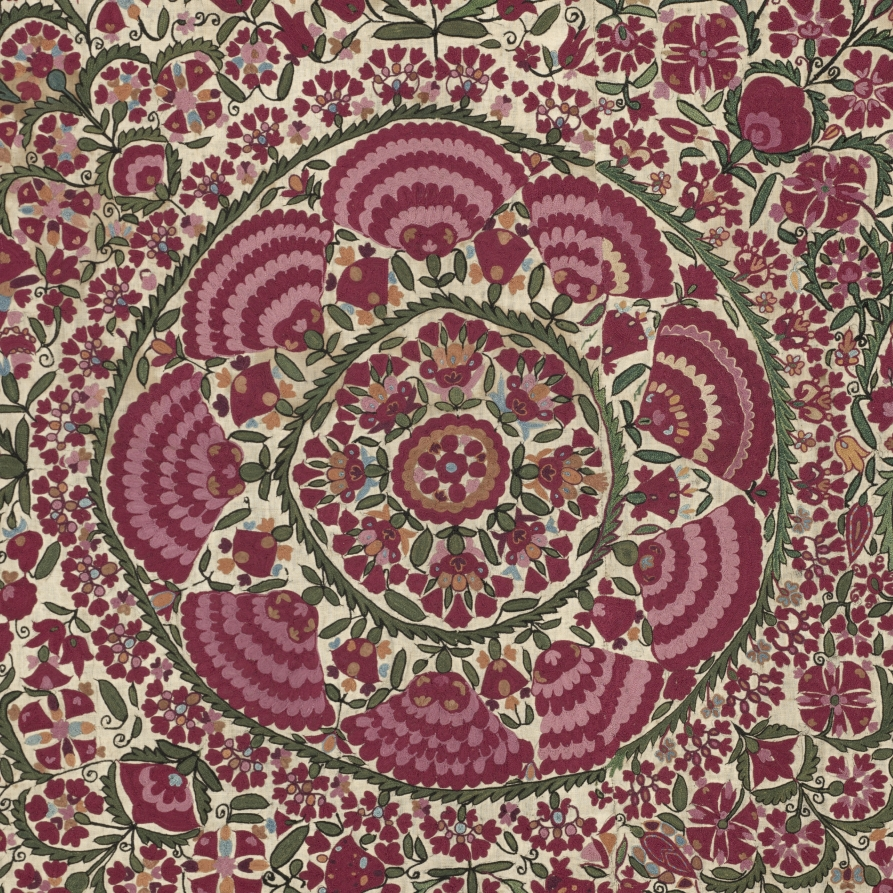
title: Curtain or bedcover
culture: Tajikistan, Ura Tube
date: early 1800s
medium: plain weave: cotton; embroidery: silk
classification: Embroidery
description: Known as suzani, embroideries with elaborate floral decoration from Central Asia were a significant part of a bride’s dowry and were ceremoniously displayed on special occasions. Women embroidered suzani, mothers passing their skills on to their daughters. Floral and foliate motifs generally dominate, emboldened with several shades of red and multiple borders, perhaps conveying cosmological, medicinal, or fertility associations. However, few display a more bountiful blossoming garden than seen here. Flora radiates from the central fanlike bouquet, a design echoed in the corners of the field and in the wide border, characteristic of work from Bukhara, Uzbekistan. Patterns were drawn on several loosely joined cotton cloths and then embroidered in chain stitch.